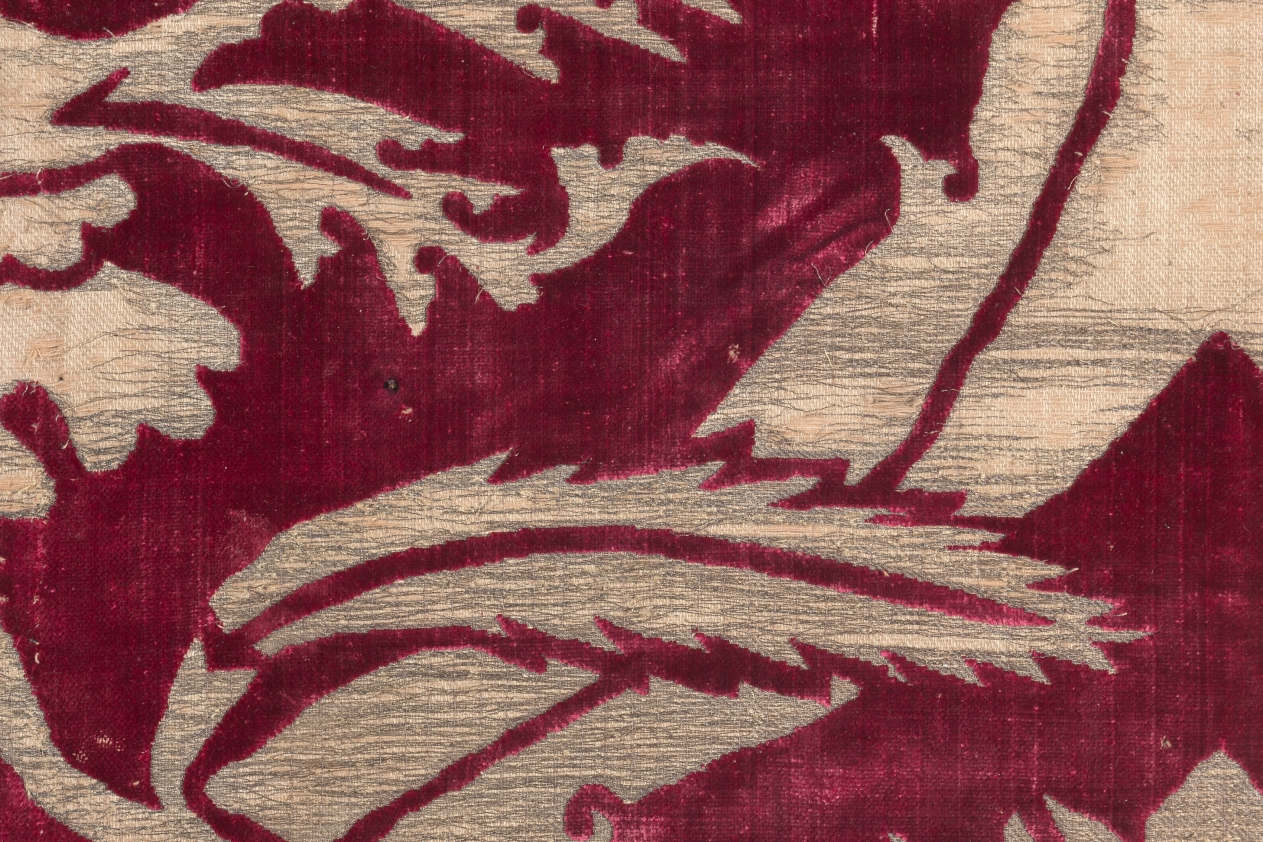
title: Brocaded Velvet Panel with Italianate Pattern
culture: Turkey, Istanbul or Bursa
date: 1575–1625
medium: Silk: velvet, brocaded; gilt-metal thread and cotton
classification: Velvet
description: Rarely are four fabric widths preserved together from any culture. This gilt-metal thread pattern combines Turkish and Italian features: the large ogival (curved) lattice clasped by crowns and the velvet structure are Turkish, and the two so-called artichoke designs are enlarged adaptations of Italian motifs. A symbol of wealth and power, this velvet panel was woven during the artistic height of the Ottoman Empire in the late 1500s. It may have covered a divan (sofa) or possibly enhanced a wall during cold winters in the imperial Topkapi Palace in Istanbul.